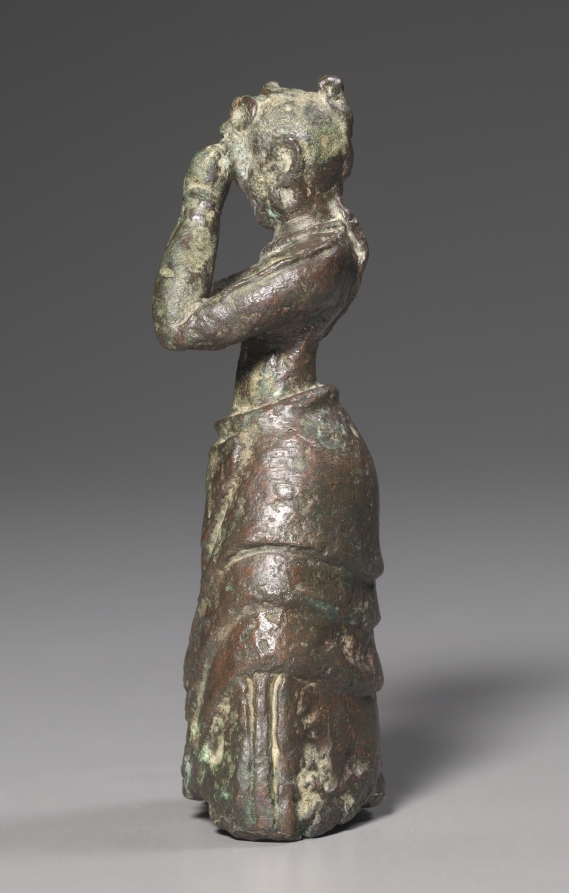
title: Female Worshiper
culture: Crete, Minoan, middle Minoan III–late Minoan I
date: c. 1600–1500 BCE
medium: bronze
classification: Sculpture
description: This extremely rare Minoan bronze statuette represents a girl worshiping a deity. It was probably left as a dedication to a divinity. She wears a flounced skirt over a sleeved robe open at the front. The figure shows a remarkable degree of detail, including looped earrings, bracelets, and a necklace. Her shaved hairstyle, not found on any other Minoan bronze statuette, matches that of painted figures in roughly contemporary frescoes uncovered on the island of Thera, north of Crete. Its excellent condition, rarity, fine detail, and balanced proportions set it apart from other statuettes of its type to have survived.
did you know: The shaved head with prominent locks of hair indicates that this female votive figure is an adolescent.